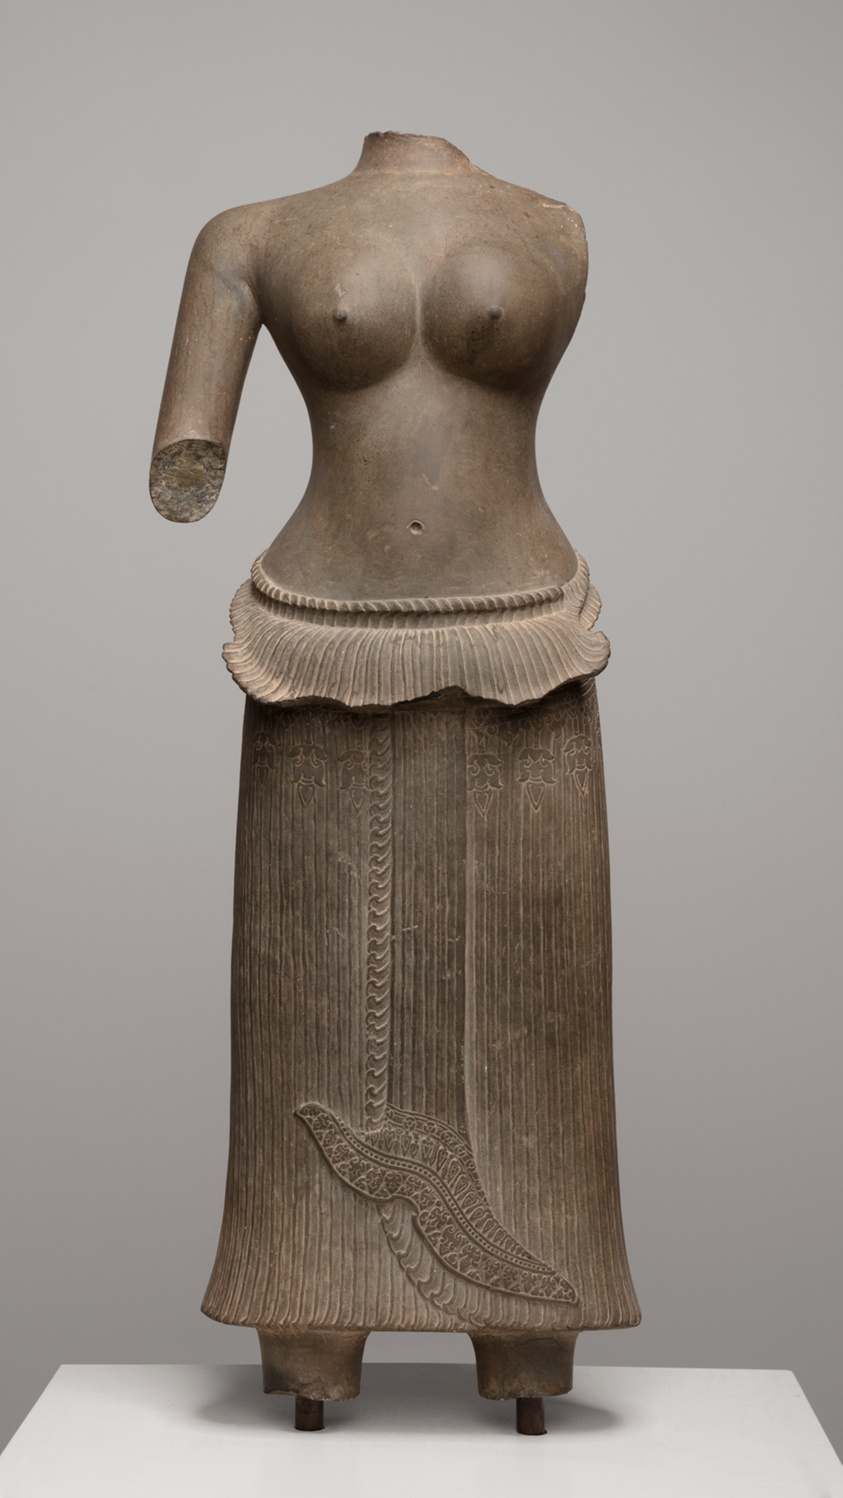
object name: Sculpture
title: A Goddess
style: Southeast Asian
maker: Cambodia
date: Angkor period, 12th century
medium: Sandstone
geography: Cambodia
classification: sandstone; stone; sculpture; asian art